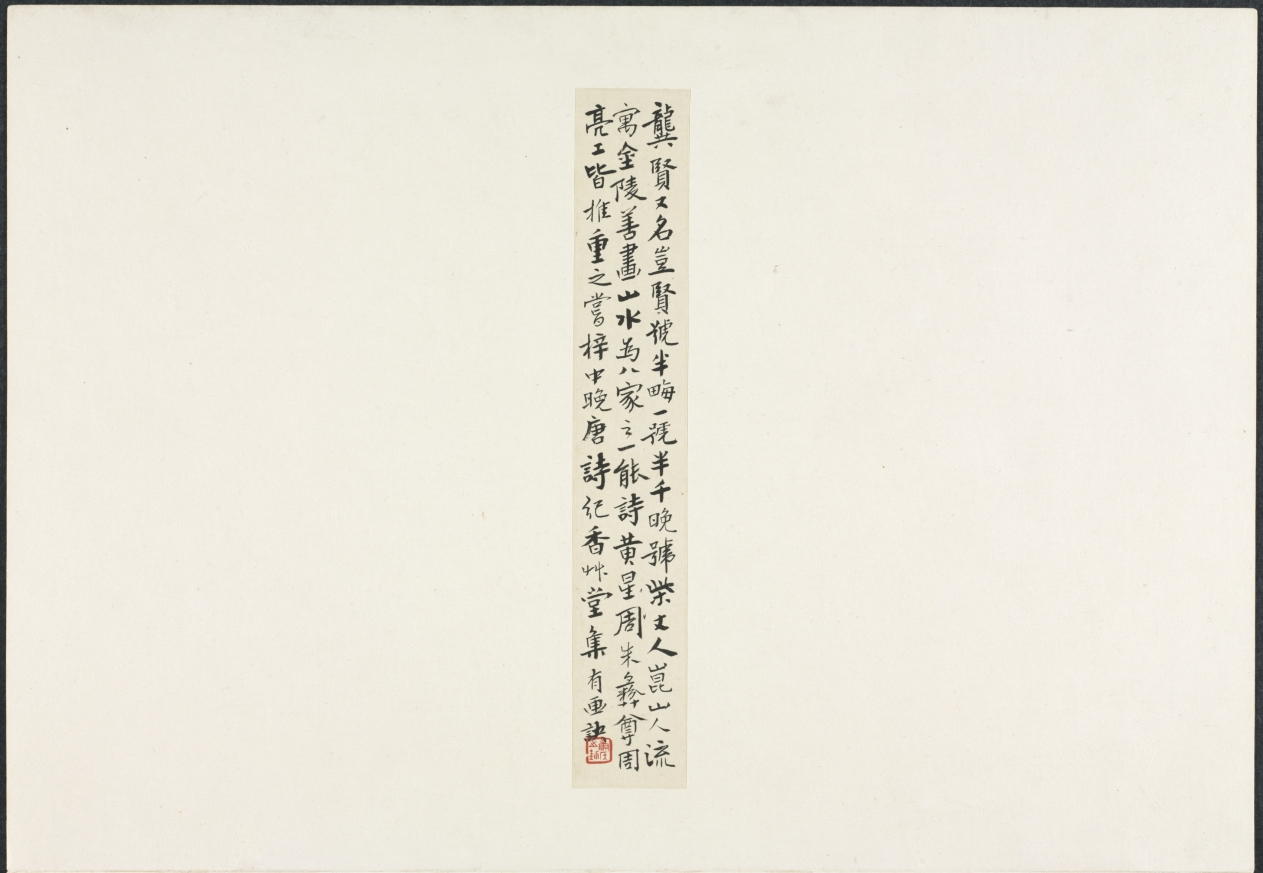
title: Summer in the Water Country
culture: China, Qing dynasty (1644-1911)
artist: Gong Xian (Chinese, 1599–1689)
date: 1670s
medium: Album leaf; ink on paper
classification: Painting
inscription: Artist's seal: Ban qian 半千. 1 additional seal unidentified.